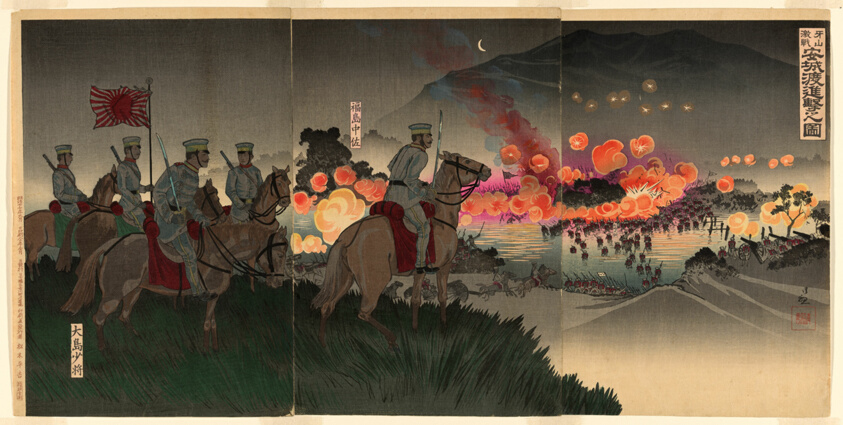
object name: Print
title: Advancing across the Ansong River at the Battle of Asan (Gazan gekisen Anjo no watashi shingeki no zu)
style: Japanese (culture or style)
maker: Kobayashi Kiyochika (Japanese, 1847-1915)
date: 1894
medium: Color woodblock print; oban triptych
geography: Japan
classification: woodblock print; print